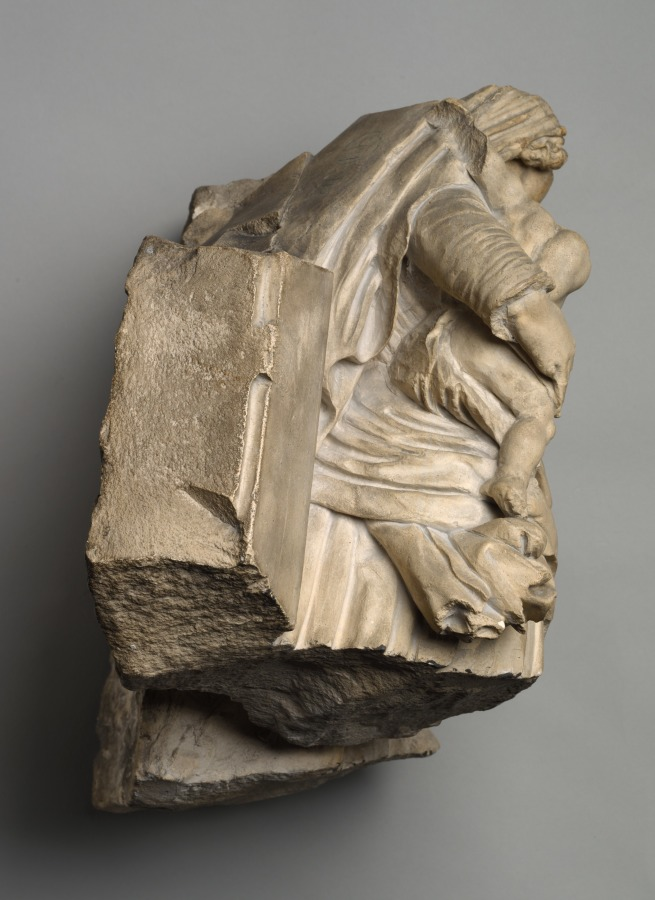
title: Fragment of a Female Figure with Child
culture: France, School of Troyes, 16th century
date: early 1500s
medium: stone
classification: Sculpture